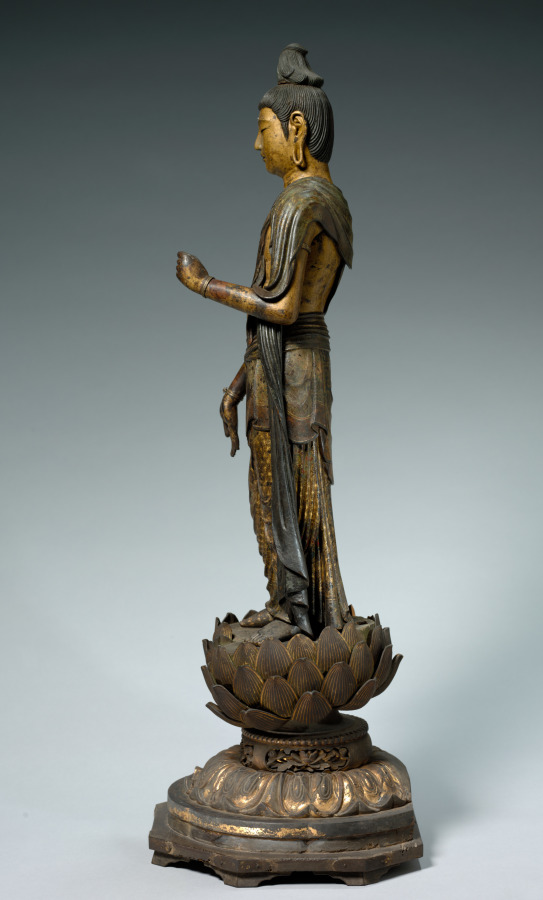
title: Bodhisattva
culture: Japan, Kamakura period (1185–1333)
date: c. 1200–1250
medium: lacquered wood with color, gilt copper, and cut-gold (kirikane)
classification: Sculpture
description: This sculpture represents one of two bodhisattvas who flank the Buddha Amida, the Buddha of Infinite Life and Light. He has one foot in front of the other and his right leg bent at the knee to show that he is in motion; his torso also sways. He accompanies Amida as he descends to collect a dying person who has asked to be born after death into Amida’s Pure Land, a place conducive to progressing along the path to enlightenment.